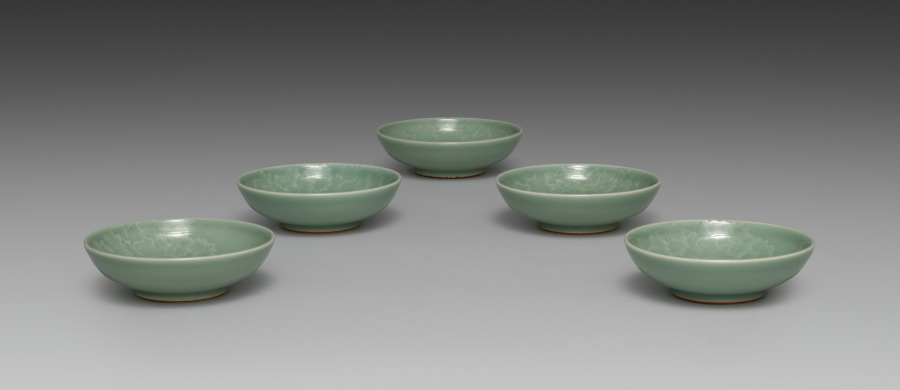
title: Dishes with Ivy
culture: Japan, Meiji period (1868–1912)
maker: Seifū Yohei III (Japanese, 1851–1914)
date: 1893–1914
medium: Set of five dishes; porcelain with green glaze and molded design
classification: Ceramic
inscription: 清風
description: Yohei III’s main output for his sophisticated clientele was in the form of tea sets and dining sets. He often produced in pairs, sets of five, or sets of ten. This set of five dishes with a green glaze and designs of ivy vines in very low relief has unfortunately lost its box. These dishes are slightly larger than the other dishes, like CMA 2022.187, and so may have been not saucers but rather small plates for meals.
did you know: In his career, Seifū Yohei III created a range of dishes in green glazes.